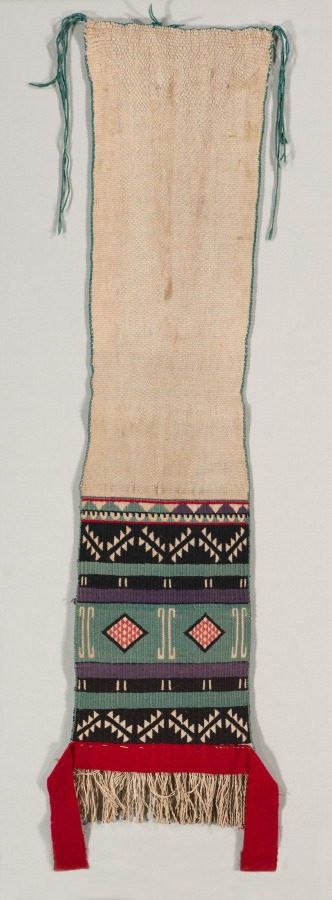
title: "Hopi Brocade" style Dance Sash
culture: America, Native North American, Southwest, Pueblo (Hopi?), Post-Contact, Transitional Period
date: c. 1880–1900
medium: plain weave with supplementary weft wrap: cotton and wool (handspun, Germantown, and bayeta)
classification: Textile